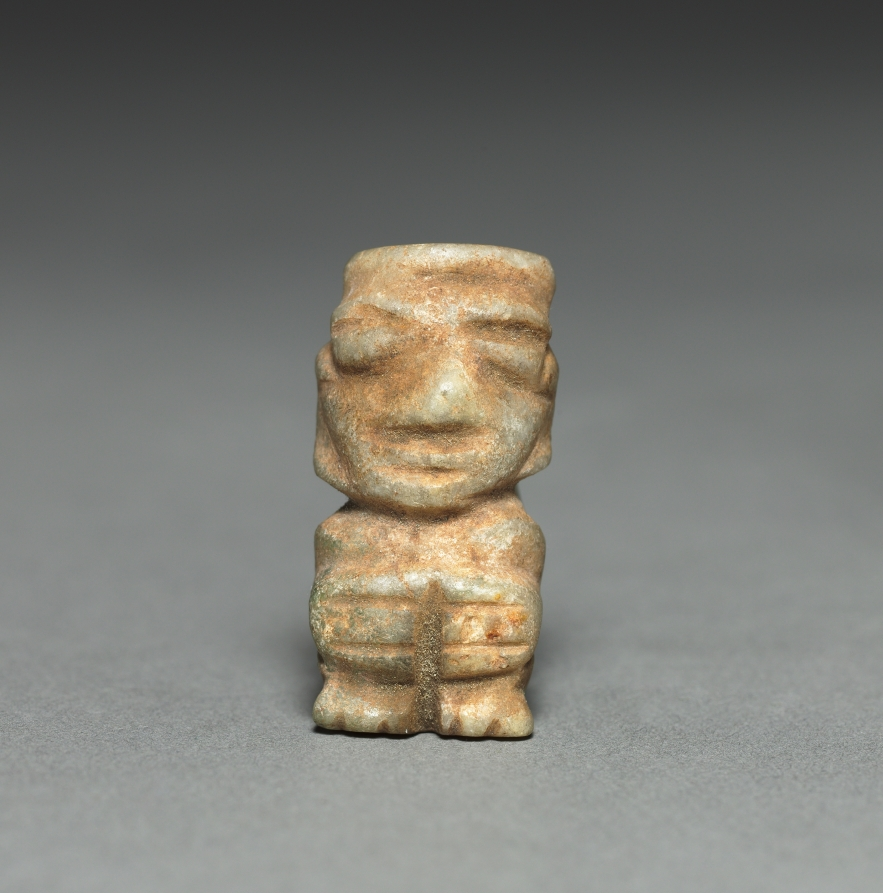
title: Figurine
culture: Mexico, Valley of Mexico (?)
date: before 1521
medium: jadeite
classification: Jade